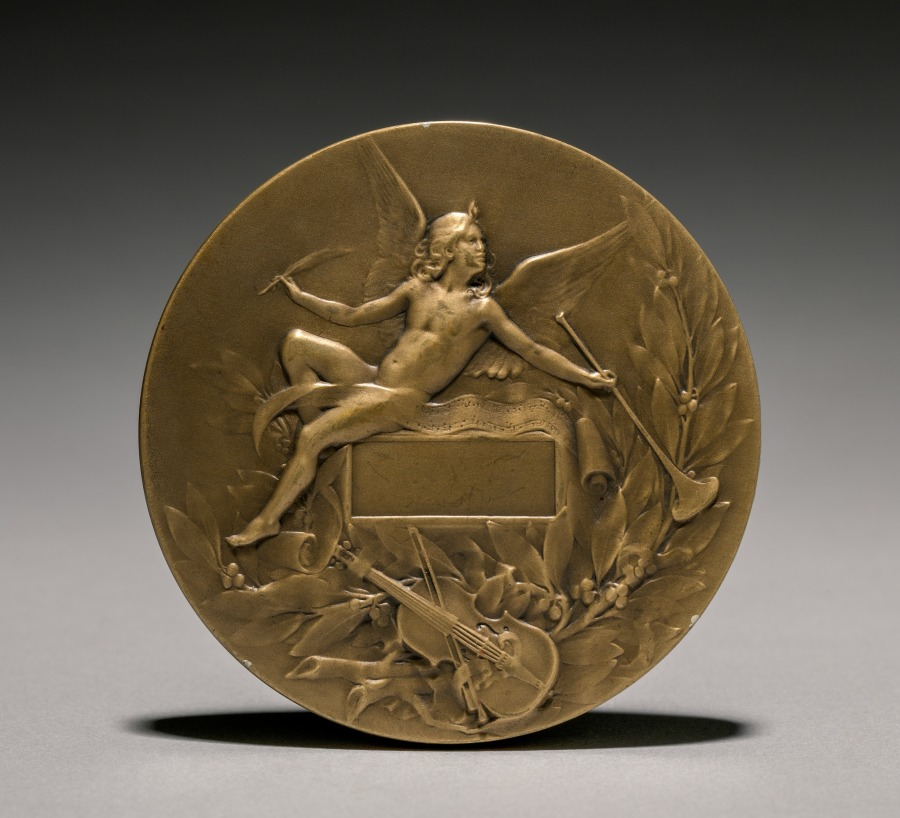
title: Medal (reverse)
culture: France, 20th century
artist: Marie Alexandre Lucien Coudray (French, 1864–1932)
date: 1900s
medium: bronze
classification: Metalwork